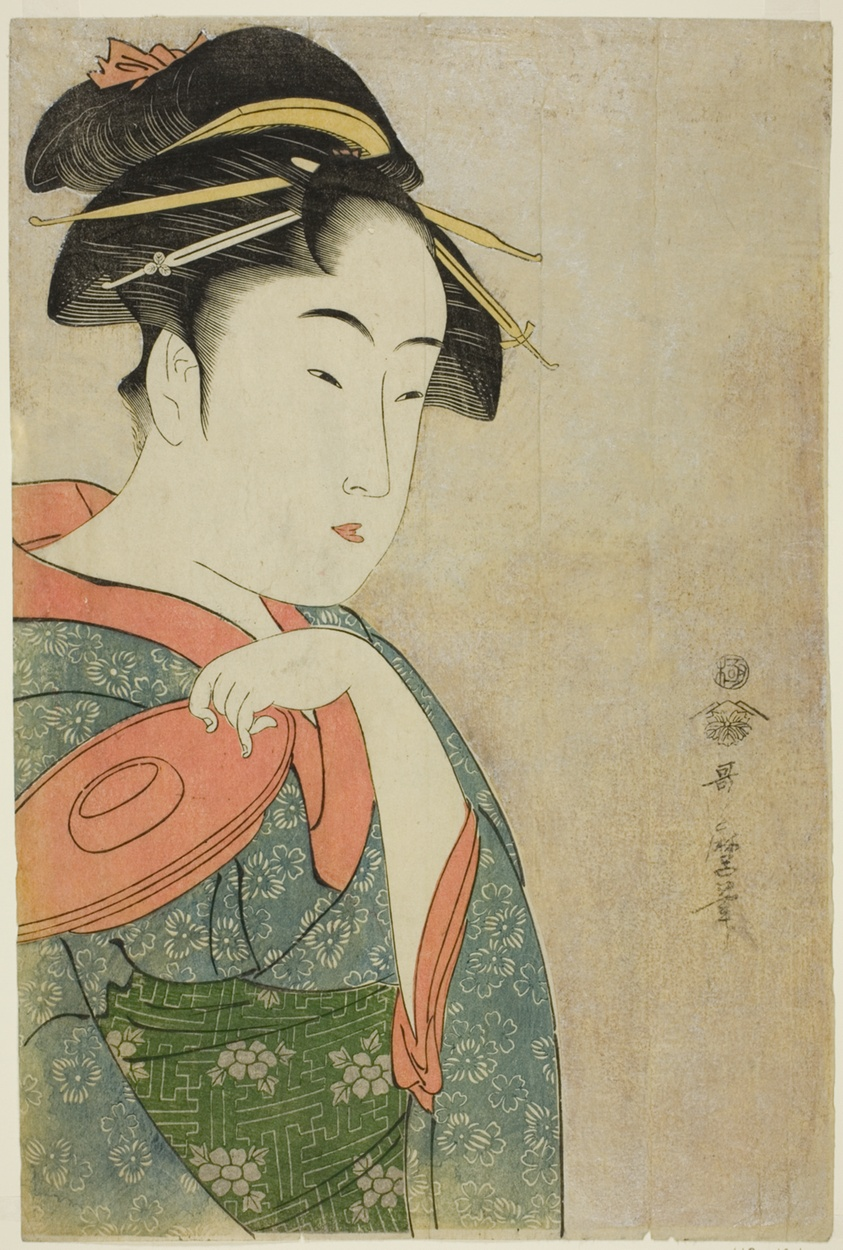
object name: Print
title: Takashima Ohisa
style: Japanese (culture or style)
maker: Kitagawa Utamaro 喜多川 歌麿; Japanese, 1753 (?)-1806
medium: Color woodblock print; oban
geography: Japan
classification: woodblock print; print; asian art